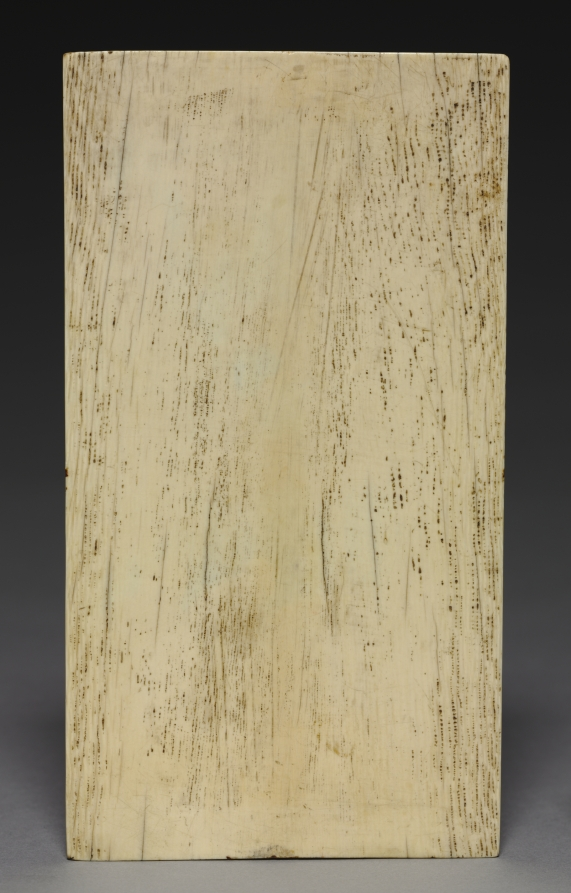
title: Diptych with Scenes from the Life of Christ (left wing: Raising of Lazarus and Crucifixion)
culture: Germany, Thuringia or Saxony, 14th century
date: c. 1350–1375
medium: ivory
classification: Ivory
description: Ivory diptychs (two panels hinged together) were used for private devotion by their aristocratic owners. The scenes represented here are Christ’s Entry into Jerusalem, the Raising of Lazarus, the Crucifixion, and Christ’s Entombment. They suggest choices made by the original owner who wished to contemplate these aspects of Christ’s passion.